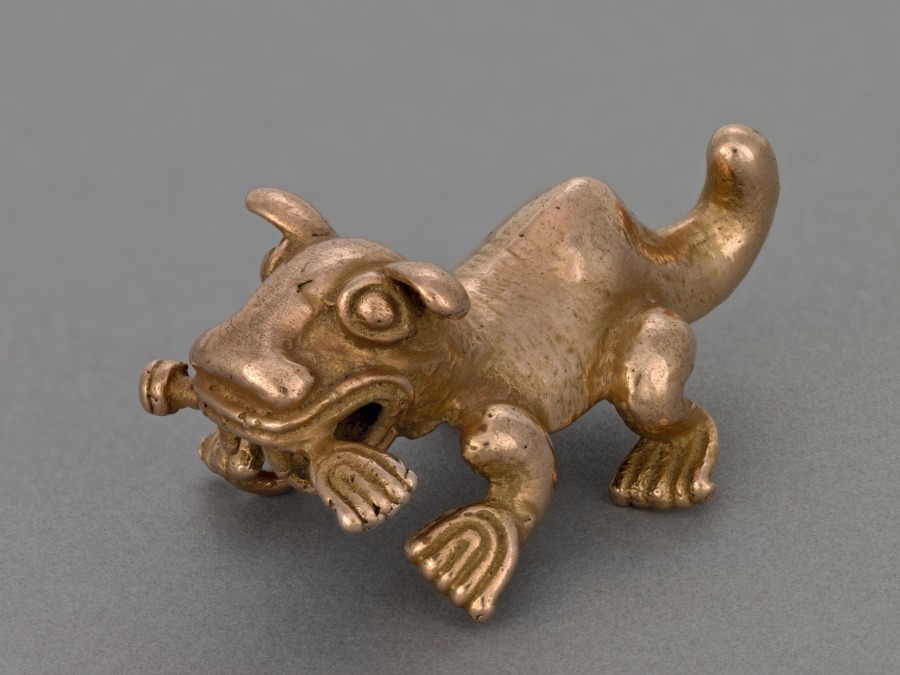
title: Feline Pendant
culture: Isthmian Region, Panama-Costa Rica, Veraguas-Chiriquí style, 11th century-16th century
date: 1000–1550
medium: gold, cast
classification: Metalwork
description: This memorable jaguar pendant is a nasty precious—nasty because it holds a severed limb (probably human) in its fanged mouth but precious due to its material, its well-polished silky surface, and the charming rendering, which reduces the jaguar to cartoon-like essentials. The warm, rosy color is the result of copper in the alloy.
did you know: In the Panama-Costa Rica region gold ornaments were associated with political and religious authority.